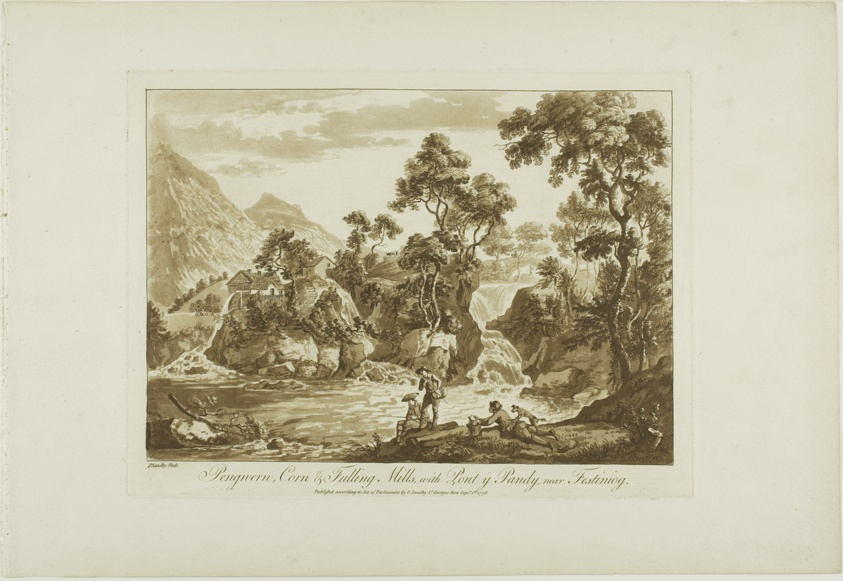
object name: Print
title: Pengnern Corn and Fulling Mills, with Pont y Pandy, Near Festiniog, from Twelve Views in North Wales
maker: Paul Sandby (English, 1731-1809)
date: 1776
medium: Aquatint with etching on ivory laid paper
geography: England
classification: etching; print; prints and drawing